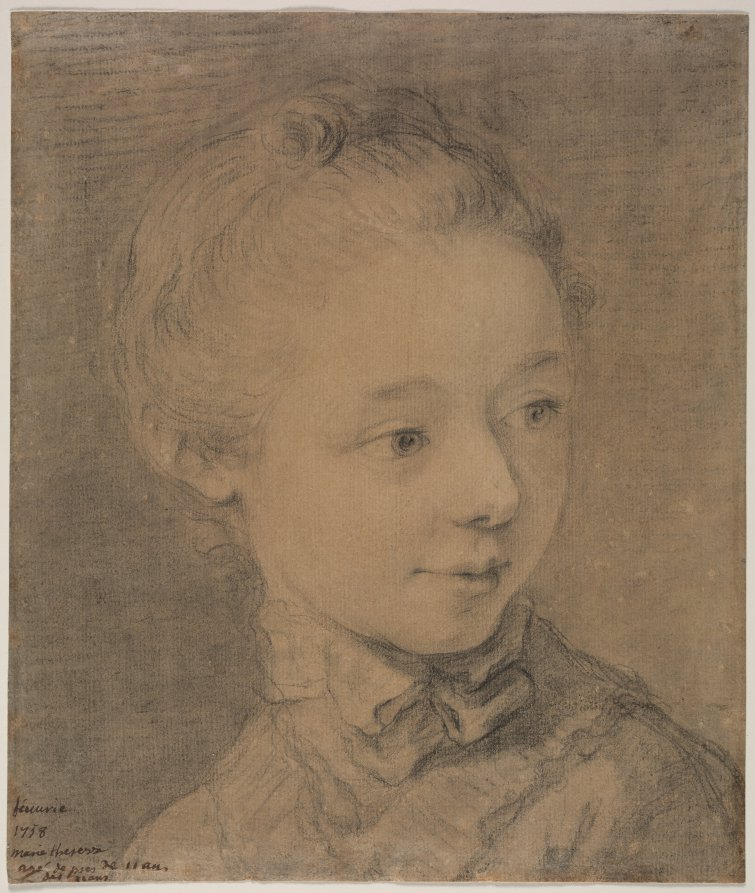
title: Head of a Young Girl Turning toward the Right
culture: France, 18th century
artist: attributed to François Hubert Drouais (French, 1727–1775)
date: 1758?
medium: black chalk, with stumping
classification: Drawing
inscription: lower left, in brown ink: [févrie?] / 1758 / marie theresse / agé de pres de 11 ans / des 11 ans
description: Although once attributed to the painter Louis Tocqué (1696-1772), this beautiful drawing of a young girl is closer to the work of another important portraitist of the 1700s, François-Hubert Drouais. The inscription at the lower left identifies the girl as a certain Marie-Thérèse, but this writing was probably added later, and we have no way of knowing for certain who she is.